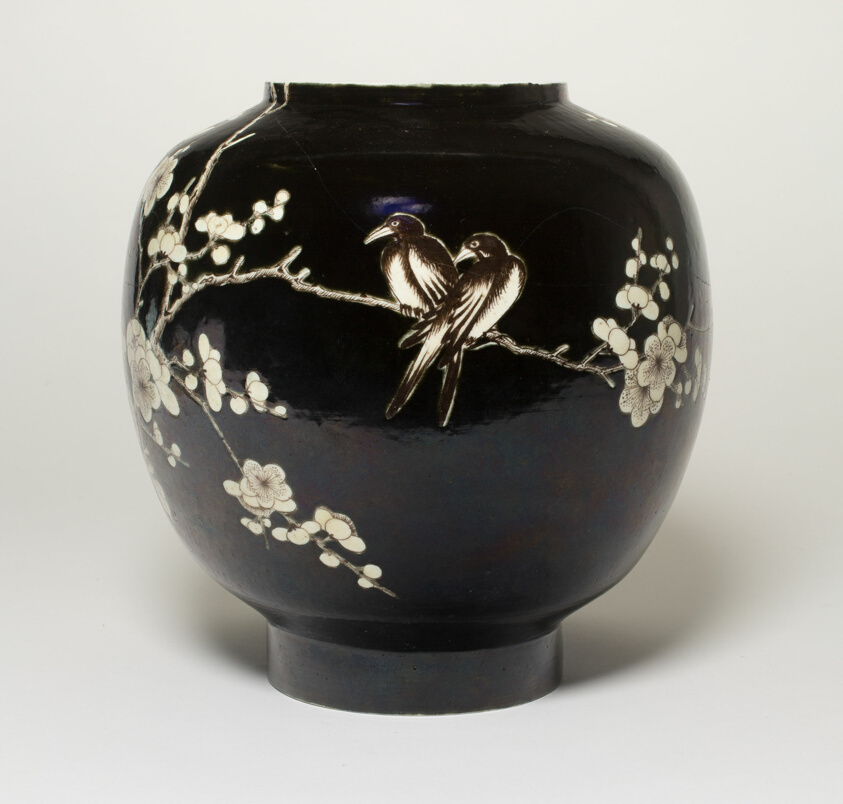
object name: Vessel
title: Lantern Globe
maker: China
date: Qing dynasty (1644–1911), Daoguang period (1821–1850)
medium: Porcelain painted in overglaze black enamel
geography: China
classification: porcelain; asian art; ceramics